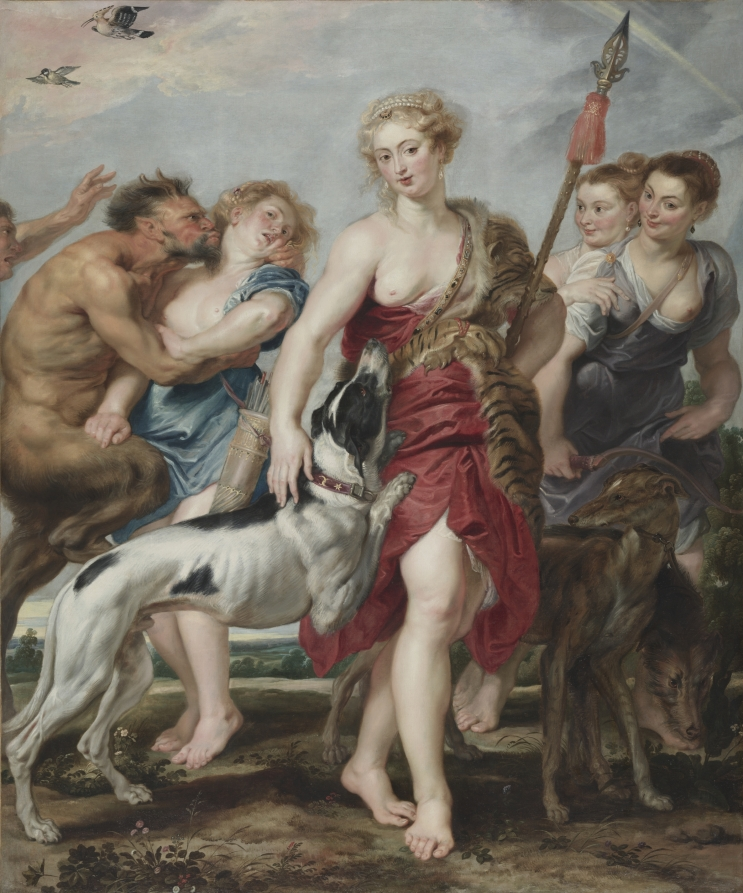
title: Diana and Her Nymphs Departing for the Hunt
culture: Flanders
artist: Peter Paul Rubens (Flemish, 1577–1640)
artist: and Workshop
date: c. 1615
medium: oil on canvas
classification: Painting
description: Diana, the Roman goddess of the hunt, wears a crescent on her forehead, also identifying her as the moon goddess. Diana lived apart from men, accompanied by a group of nymphs; she often represented unattainable beauty or chastity. With a nymph at left fending off a lustful satyr, Rubens refers to a struggle between vice and virtue, combining a sensual display of female bodies with a moral undertone. To bring the viewer more fully into the narrative, Rubens pulls the full-bodied figures to the front of the picture plane, and Diana steps forward, activating the space between viewer and subject. The nymph at the right has the features of Isabella Brant, the artist’s wife, and can be compared with Rubens’s portrait of her, also in the museum's collection.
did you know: The moon and stars on the white and black dog’s collar indicate that both hounds are companions of Diana, accompanying the goddess on her hunts.